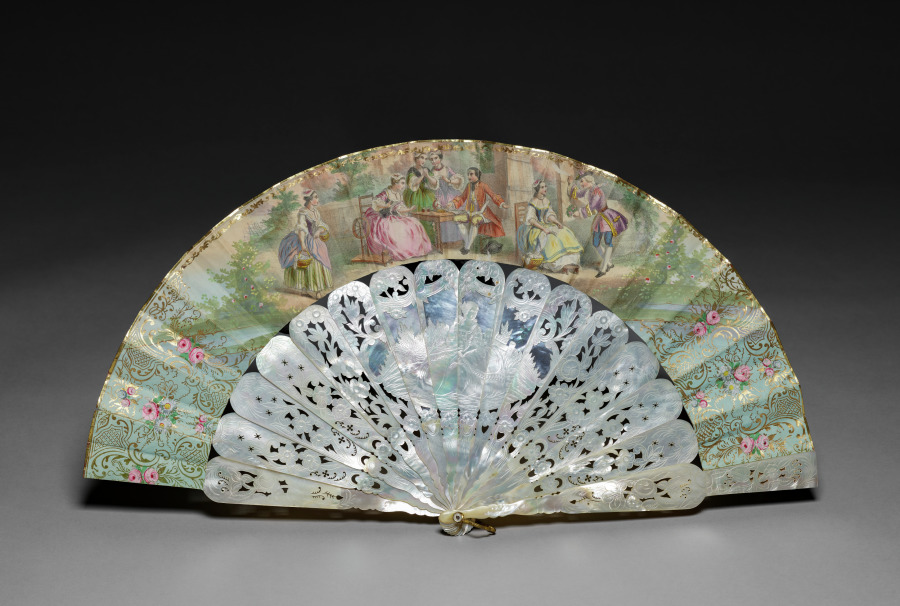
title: Fan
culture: Europe, mid-19th century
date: mid 1800s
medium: ivory with gilding, painted and gilt paper, painted silk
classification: Miscellaneous